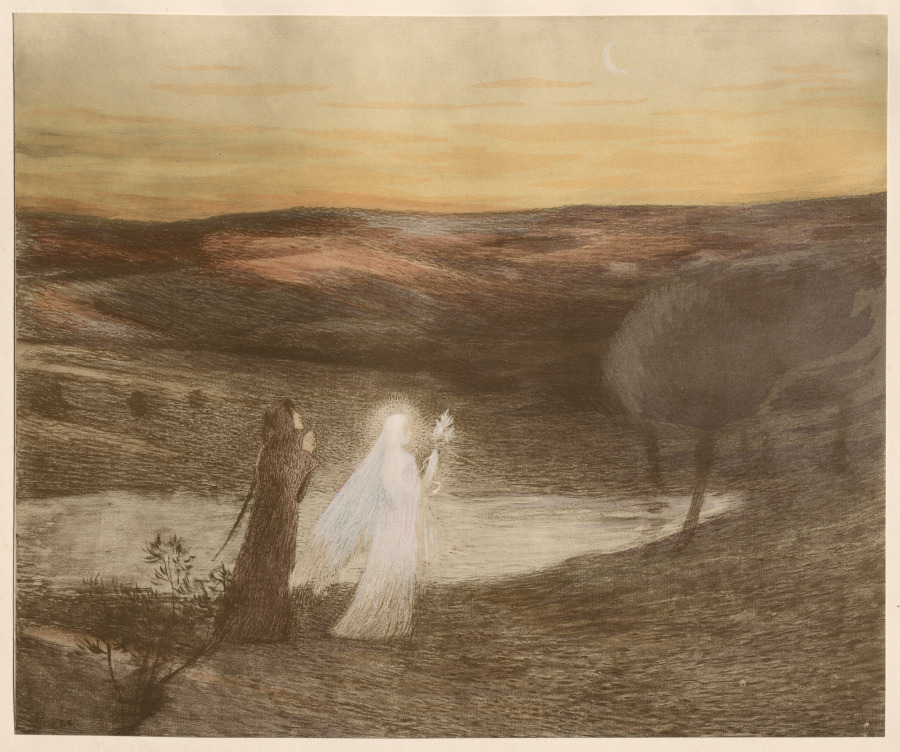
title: Dante Rencontre Béatrix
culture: France, Paris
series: L'Estampe Moderne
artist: Henri Jean Guillaume Martin (French, 1860–1943)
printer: Imprimerie Champenois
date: 1899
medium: Color lithograph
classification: Bound Volume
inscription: In plate: lower left corner of image: overlaid "J", "G", and "M", followed by the date - 98; upper right corner of sheet: blindstamp of l'Estampe Moderne (Lugt 2790)